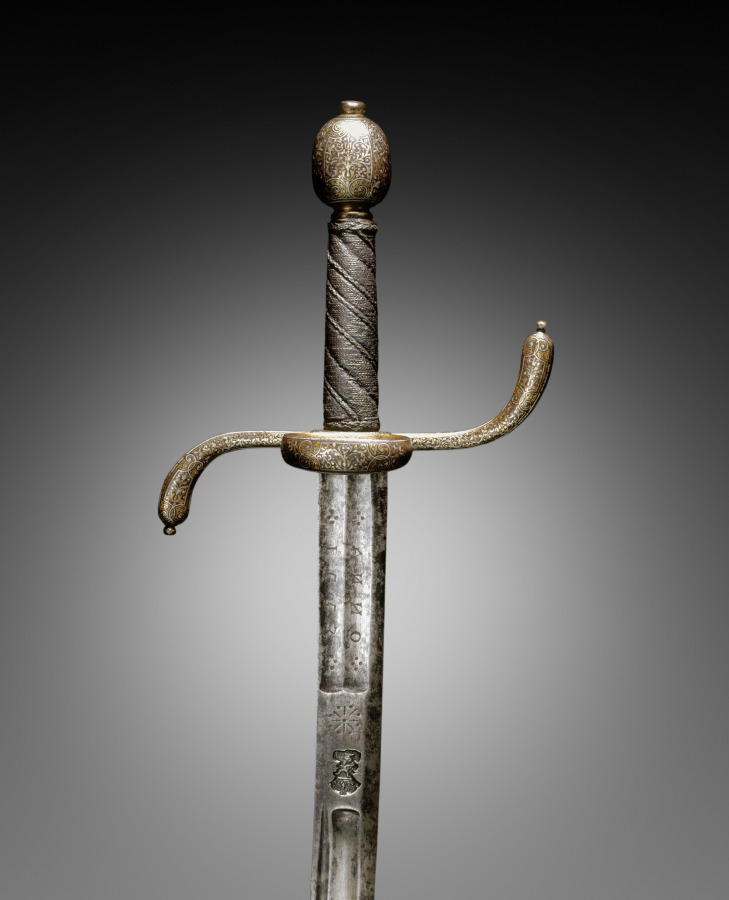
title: Hanger (Hunting Sword)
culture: Hilt: Italy (?); Blade: Germany, Saxony, late 16th-17th Century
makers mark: Jaspar Bongen the Younger (German, active late 1600s)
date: late 1600s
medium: steel; gold and silver damascened hilt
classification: Arms and Armor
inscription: "1553" (Presumed to be a commemorative date)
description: Damascening, the technique of hammering gold and silver wires into grooves cut to receive them, enlivens this sword's hilt. Further texture was added with wires to improve the user's grip, which allowed him to hunt with more control and accuracy. Hunting was a popular sport among the wealthy and many nobles owned tracts of forest, but peasants were prohibited from hunting on these lands.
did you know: The swordsmith's mark, a crowned stag visible on the blade below the hilt, is unidentified.